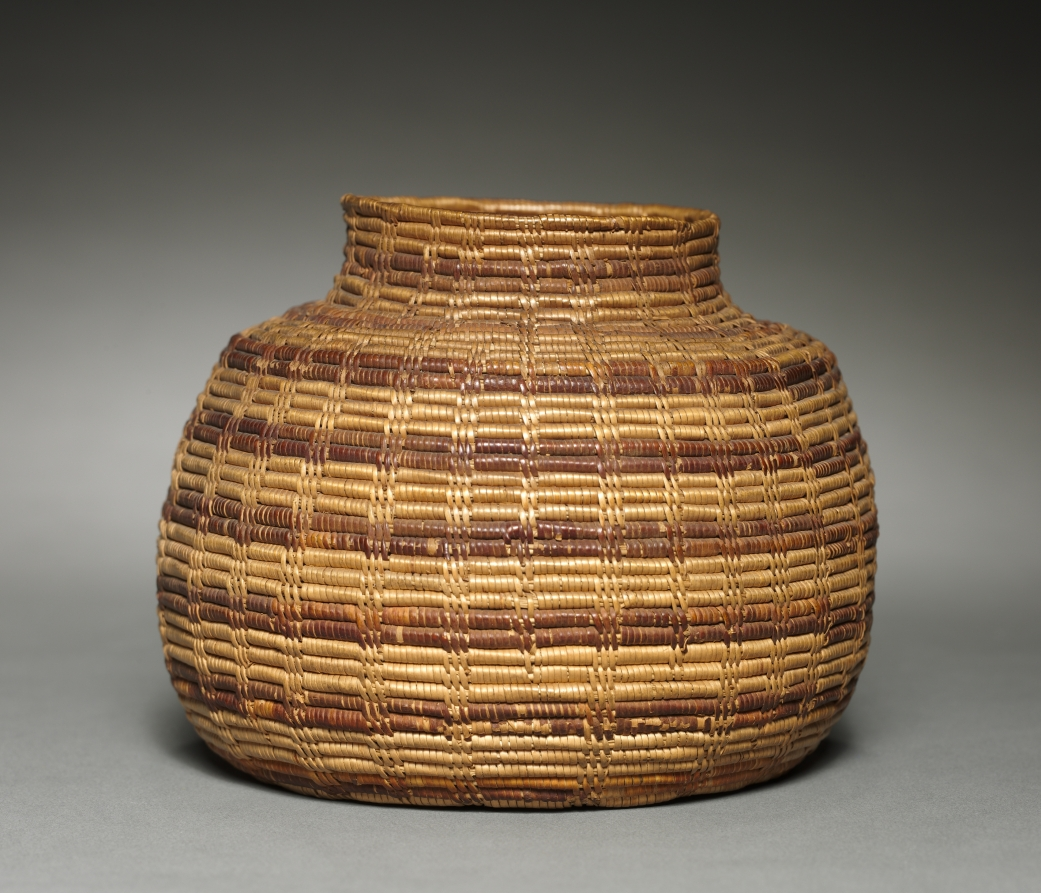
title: Jar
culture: California, Tübatulabal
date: 1895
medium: Sumac, yucca root; coiled, skip-stitch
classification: Basketry